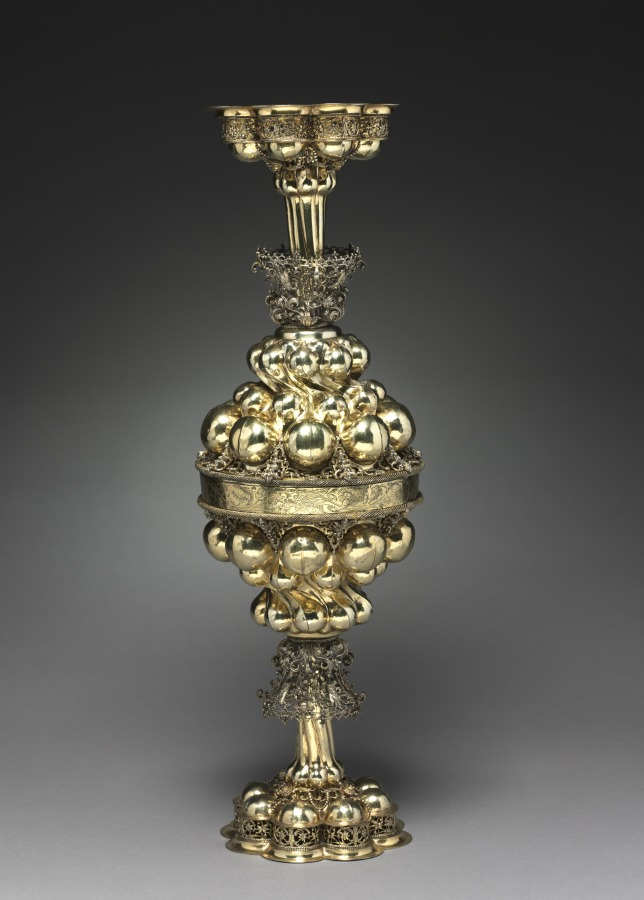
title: Double Goblet (Pokal)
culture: Germany, Nuremberg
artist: Alexander Treghart (German, active 1614–1654)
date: c.1614–32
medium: gilt silver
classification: Metalwork